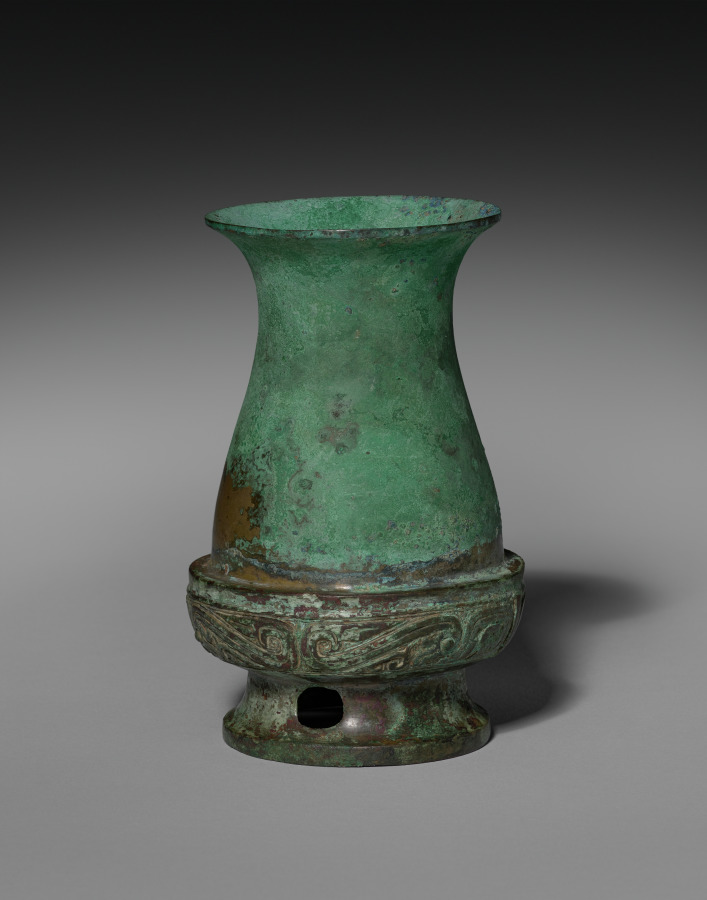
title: Wine Vessel (Hu) (lid)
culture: China, Western Zhou dynasty (c. 1046–771 BCE)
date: c. 1000–900 BCE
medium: bronze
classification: Metalwork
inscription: inscription inside top (cup): 事从作壺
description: This tall, slender bronze wine vessel, called a hu, has three bands of ornamentation: one above the foot, one around the neck, and one on the cover. Stylized birds or phoenixes are in the band around the neck, while the band on the cover and foot feature geometric dragons. The dragon and the phoenix may represent the Yin and Yang and would be equally appropriate on a bronze of either secular or religious purposes. It likely held liquids like wine at festive banquets or religious ceremonies.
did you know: When inverted, the cover forms a cup.